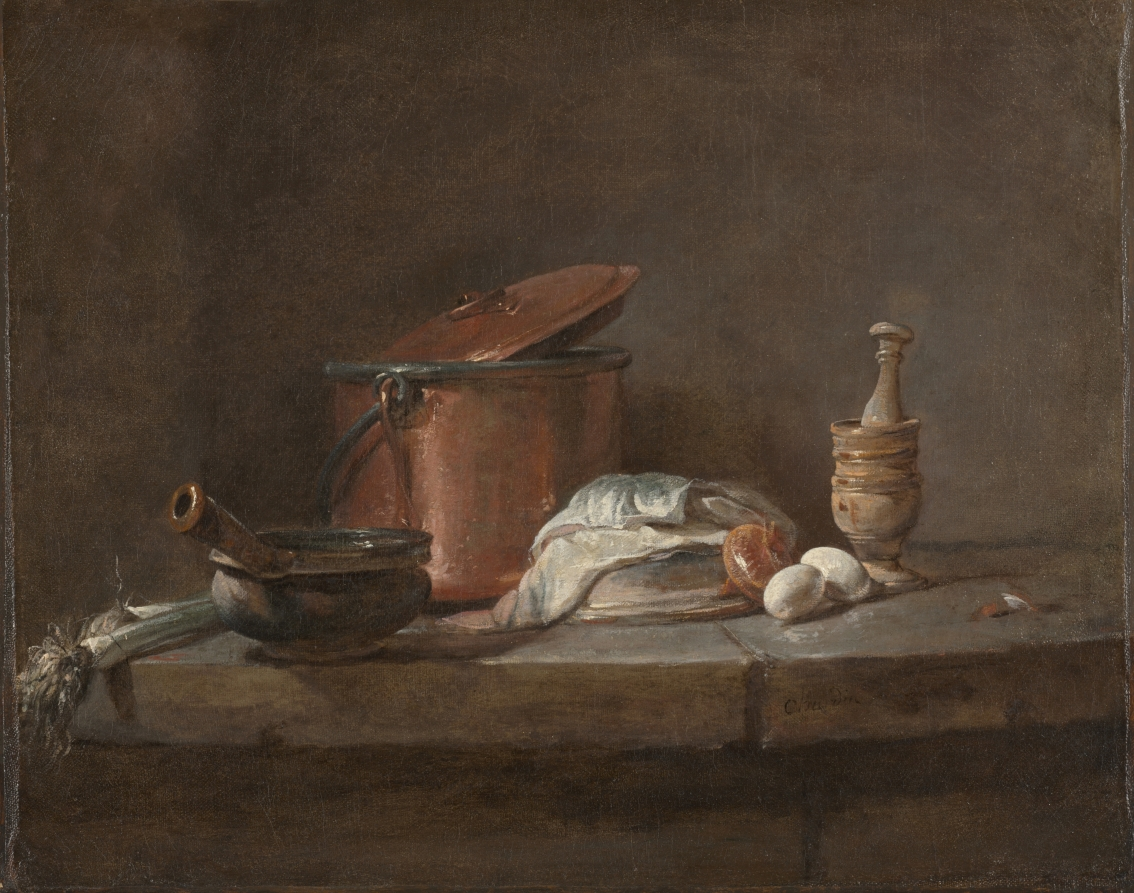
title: Kitchen Utensils with Leeks, Fish, and Eggs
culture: France, 18th century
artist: Jean-Siméon Chardin (French, 1699–1779)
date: c. 1734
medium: oil on canvas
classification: Painting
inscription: Signed lower right: "Chardin"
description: Chardin was already famous by 1730, when he began to paint small, sparse still lifes of kitchen utensils. He often used the same elements in his compositions, varying slightly the position of the objects and adding or subtracting a utensil—always carefully placing each in relation to the rest to achieve a balanced design. Chardin was the contemporary of François Boucher (1703–1770) and he taught Jean-Honoré Fragonard (1732–1806), but his work is a contrast to theirs, representing the naturalistic tendency that persisted alongside the more fashionable lightness, grace, and playfulness of the Rococo. Chardin discovered a hidden poetry in even the most humble objects, bringing the viewer into an earthly world experienced with directness and simplicity.